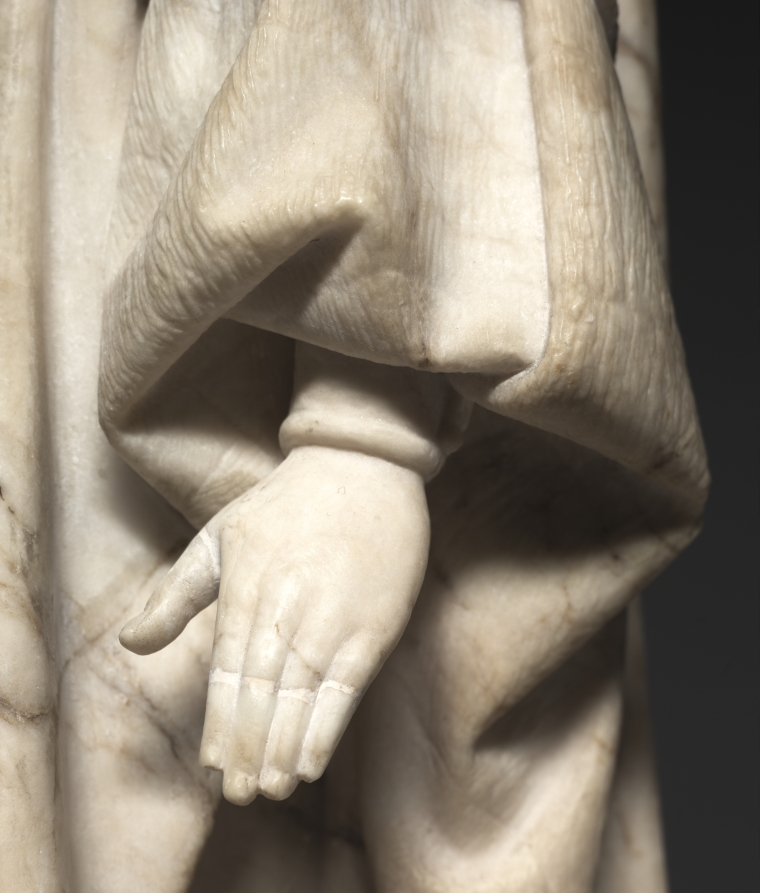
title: Mourner from the Tomb of John the Fearless and Margaret of Bavaria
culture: Spanish, Burgundy, Dijon, 15th century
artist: Jean de la Huerta (Spanish, active Burgundy, 1431–62)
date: 1443–45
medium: salins alabaster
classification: Sculpture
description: This monklike figure has a variously textured monochrome surface. Alabaster’s softness made it easy to carve details like the fabric and fur of the mourner’s robe and the codex pages in his hand. This is one of 40 mourners from an elaborate funeral procession beneath an intricately carved alabaster arcade. This mourner comes from the monastery of Champmol near Dijon, which became a primary burial place for Burgundian dukes. The sculpture was part of the tomb of John the Fearless (1371–1419), commissioned by his son Philip the Good (1396–1467), modeled after the earlier monument for Philip the Bold.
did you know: A plaster cast of this mourner adorns the Tomb of John the Fearless and Margaret of Bavaria in Dijon, France.